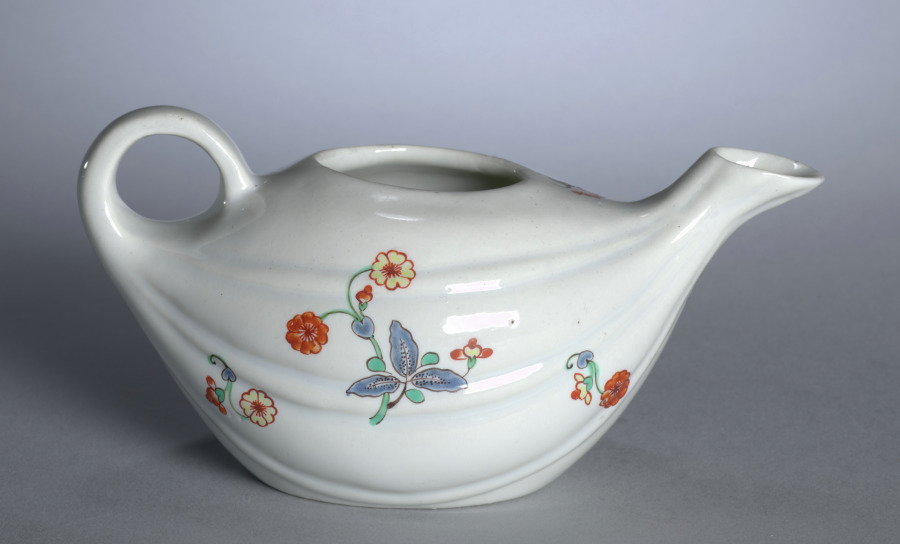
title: Teapot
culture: France, Chantilly, 18th century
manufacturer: Chantilly Porcelain Factory (French)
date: c. 1730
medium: soft-paste porcelain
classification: Ceramic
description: The pieces composing this individual tea set are entirely typical of Chantilly soft-paste porcelain in the Kakiemon style. Both the form and decoration of these pieces were inspired by Japanese prototypes. The use of knobs in the form of trumpet-shaped blossoms is characteristic of Chantilly wares.